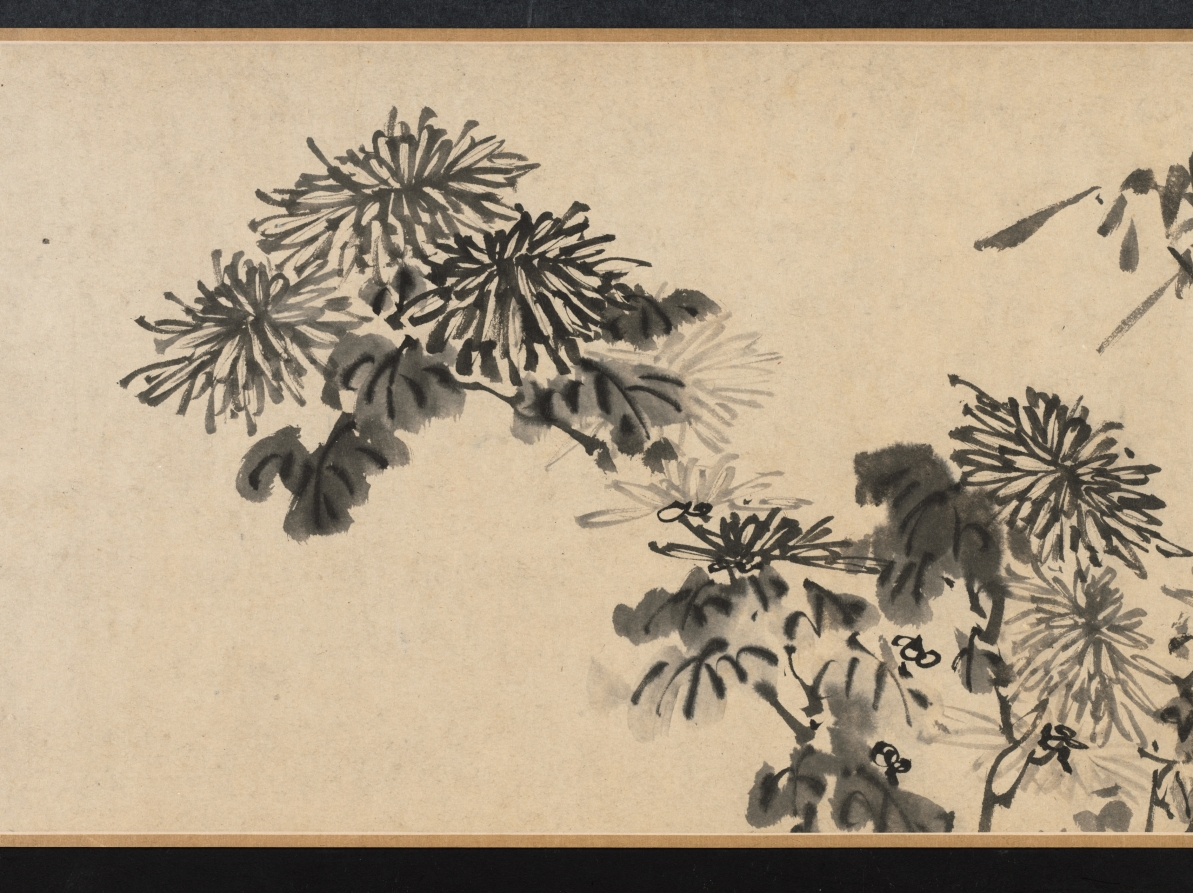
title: Chrysanthemums and Cabbage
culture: China, Ming dynasty (1368–1644)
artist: Tao Cheng (Chinese, active c. 1471–after 1502)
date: c. 1486 or before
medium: handscroll, ink and slight color on paper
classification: Painting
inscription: Artist's seal at beginning of painting: Yun hu 雲湖. Title by Wang Wenzhi 王文治 (1730–1802), date 1756. 2 seals of Wang Wenzhi 王文治 (1730-1802); 3 seals of Ku Yün (n. d.)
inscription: Section A (Chrysanthemums): 1 poem and 1 seal of Zhang Yuanzhen 張元禎 (1437–1507) - Jinshi, 1461; 1 poems and 3 seals of Ni Yue 倪岳 (1444–1501) - Jinshi, 1464; 1 poems and 2 seals of Zhao Xiang 趙祥 (life dates unknown) - Jinshi, 1469; 1 poems and 1 seals of Wu Xixian 吳希賢 (1437–1489) - Jinshi, 1464; 1 poems and 1 seals of Lü Chang 呂㦂 (1449–1511) - Juren, 1471; 1 poems and 3 seals of Fu Han 傅瀚 (1435–1502) - Jinshi, 1464; 1 poems and 1 seals of Feng Jue 馮珏 (life dates unknown) - Jinshi, 1478.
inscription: Chrysanthemums section, poem 1, by Zhang Yuanzhen 張元禎 (1437–1507): Several bushes of chrysanthemums grow in front of the Five-Willow Cottage,/ The yellow ones are really yellow and the white ones white./ This affable and decent fellow, young in years and unsophisticated,/ Has snapped one of the branches to dip in ink. (The Five-Willows Cottage was the home of the poet Tao Qian 陶潛 (Tao Yuanming 陶淵明, AD 365-427).) Chrysanthemums section, poem 2, by Ni Yue 倪岳 (1444–1501): Where at the Eastern Fence can you grieve for the Soul of the Xiang River?/ A man of upright character is mourned within the traces of ink./ White jade with a slight flaw would be a grievance forever,/ Later men should understand why even the roots of the flowers are washed. (Eastern Fence refers again to the poet Tao Qian 陶潛, while the Soul of the Hsiang River refers to the poet Qu Yuan 屈原 (c. 340–278 BC).) Chrysanthemums section, poem 3, by Zhao Xiang 趙祥 (life dates unknown): A clump of chrysanthemum grows in front of the bamboo pavilion,/ The winds of many autumns have blown since we parted beyond the river./ Straining wine through the official's cap of Tao [Qian] to prolong autumn's pleasures,/ The mists and clouds of ten thousand miles belong to the intoxicated. Chrysanthemums section, poem 4, by Wu Xixian 吳希賢 (1437–1489): It is a different spring if mulberry is planted during the latter part of the year,/ The dust of the world originally did not drop on clothing./ Who spills out ink under the Eastern Fence/ And paints so freely this portrait of chrysanthemums for the venerable Sir Tao? Chrysanthemums section, poem 5, by Lü Chang 呂㦂 (1449–1511): This full tray of ink for painting [flowers] at the Eastern Fence;/ Their whiteness or yellowness is not essential in capturing their beauty./ I don't have to go to Jiangnan to see them myself./ At my old house grow two or three branches. Chrysanthemums section, poem 6, by Fu Han 傅瀚 (1435–1502): Who daubed autumn flowers with ink/ As if they were dark dew on a branch tip only vaguely seen at evening?/ After the lazy clouds disperse, no one paints;/ A certain unconventionality pervades this painting. Chrysanthemums section, poem 7, by Feng Jue 馮珏 (life dates unknown): To satisfy his hunger, [the chrysanthemums] have at times entered the poetry of Qu Yuan;/ Taking up the wine cup, it felt close to Tao Qian./ [With them I am like] a lonely root sustained by deep water/ Or an old man to whose hair the color of youth returns.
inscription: Section B (Cabbage): 1 poem and 1 seal of Cai Qi 蔡圻 (life dates unknown) - degree information not known; 1 poems and 3 seals of Ni Yue 倪岳 (1444–1501) - Jinshi, 1464; 1 poem and 3 seals of Jiao Fang 焦芳 (1436–1517) - Jinshi, 1464; 1 poem and 3 seals of Li Dongyang 李東陽 (1447–1516) - Jinshi, 1464; 1 poems and 1 seals of Wu Xixian, signed “Xixian” 吳希賢 - Jinshi, 1464; 1 poems and 3 seals of Fu Han 傅瀚 (1435–1502) - Jinshi, 1464; 1 poems and 1 seals of Lü Chang 呂㦂 (1449–1511) - Juren, 1471; 1 poems and 2 seals of Zhao Xiang 趙祥 (life dates unknown) - Jinshi, 1469; 1 poems and 1 seals of Feng Jue 馮珏 (life dates unknown) - Jinshi, 1478.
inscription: Cabbage section, poem 1, by Cai Qi 蔡圻 (life dates unknown): The ink splashes are fresh from a frosty brush dipped in pond water;/ I can visualize that time when Yunhu 雲湖 [Tao Cheng] first showed his talents./ I lament the places where I scribbled before,/ Who would open them to inscribe a poem? (The first line is an allusion to the famous Jin dynasty calligrapher Wang Xizhi 王羲之 (AD 303-361), who practiced calligraphy so diligently at the edge of a pond that the water turned black with ink.) Cabbage section, poem 2, by Ni Yue 倪岳 (1444–1501): After rain the vegetables begin to grow;/ How are the colors of the masses lately!/ Once you get used to them, the tastiest parts are the ends of the roots;/ I don't know if they can be used for "seasoning soup." ("Seasoning soup" is an allusion to the statesmanship of a chief minister.) Cabbage section, poem 3, by Jiao Fang 焦芳 (1436–1517): This crop of purple stalks and green leaves is late and irregular;/ Now the rainy season is over for the Eastern Garden./ All the nobles nowadays dine on meat;/ Who of them knows the flavor of this [cabbage]. Cabbage section, poem 4, by Li Dongyang 李東陽 (1447–1516): It's always helped the honest man to sober up after drinks./ I intend to go to the deepest part of the stream-crossed garden/ To refresh myself in the fragrance and dew of evening. Cabbage section, poem 5, by Wu Xixian 吳希賢 (1437–1489): After rain, the white silk is filled with fragrant vegetables;/ How many times this happens in Mr. Tao's paintings./ On whom will you depend to present a memorial to the ruler?/ Don't let this color emerge on the faces of the people. (The last line is meant as a warning to officials: the color of the vegetables (green) may be pleasing in itself, but when it emerges on the faces of the starving poor, it signifies a badly governed world.) Cabbage section, poem 6, by Fu Han 傅瀚 (1435–1502): For twenty years I have feasted on the excellent mutton of an official;/ Yet I talk and dream about the garden and its vegetables./ Do not merely say it is good to chew the root of the cabbage--/ You must taste to understand what poverty is. Cabbage section, poem 7, by Lu Chang 呂㦂 (1449–1511): The capital is never a place for an apprentice in the "garden of scholarship."/ Who would write about gardens and vegetables on an examination paper?/ I've walked throughout the country in spring;/ Make sure the people don't show this color. Cabbage section, poem 8, by Zhao Xiang 趙祥 (life dates unknown): After a wash of rain, the spring garden is still in order;/ The flavor [of the cabbage] is more suitable with a small drink and the hum of a tune./ The rich and powerful in their mansions consume dish after dish of meat;/ Vegetarian food is known only by the scholars. Cabbage section, poem 9, by Feng Jue 馮珏 (life dates unknown): A new cabbage is nourished with dew;/ It takes a long time to grow and mature./ The business of "seasoning the soup" is your responsibility;/ Better command the gardener to take care [of the cabbages]. trans. HK/LYSL/WKH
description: On an autumn day in Beijing, Tao Cheng had a gathering with a group of scholar-officials and created two paintings in a spontaneous, casual style. The first depicts chrysanthemums, slender bamboo stalks, and a rock in monochrome ink. Tao applied light colors for the second painting that depicts cabbage. Tao deliberately placed the images on the first sections of the paper so that his honorable guests could add their poetic inscriptions inspired by his imagery. In the first section to the right, all seven poetic inscriptions refer to the beloved poet and recluse Tao Qian (also called Tao Yuanming, AD 365–427) who was particularly known for his profound love for chrysanthemum flowers. Most of the inscriptions in the second section express sympathy for the poor, since cabbage is the main ingredient in their humble food. Taken together, the poems and paintings allude to the life and responsibilities of the scholar-official: the importance of both an upright character and a concern for the poor citizens in order to achieve good government.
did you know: Eminent calligrapher Wang Wenzhi 王文治 was only 27 sui when he wrote the title in 1756.